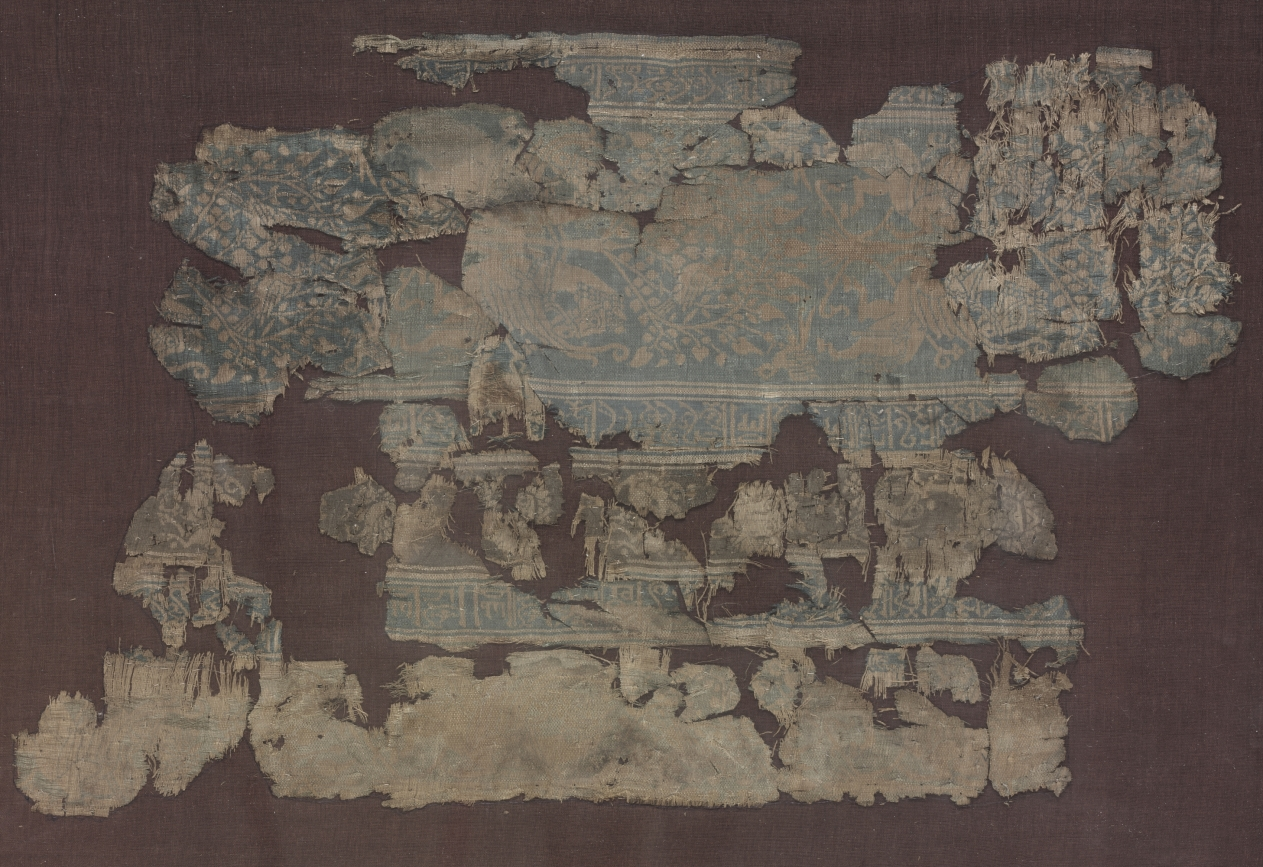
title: Silk fragment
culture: Egypt or Iran, Ayyubid period, 1100s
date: 1100s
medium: lampas: silk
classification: Textile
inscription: Design of lengthwise bands of ornament between bands of inscription which duplicate each other and read: "To owner victory and kingdom."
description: Silk of double cloth weave with design of lengthwise bands of ornament between bands of inscription.